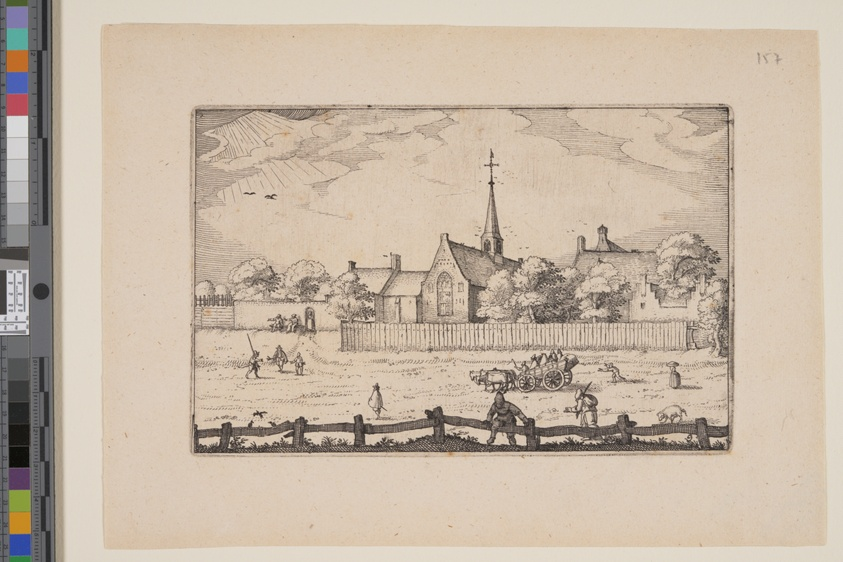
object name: Print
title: The Leper-House at Haarlem, from Views in the Surroundings of Haarlem (Plaisante Plaetsen)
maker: Claes Jansz. Visscher (Netherlandish, c. 1550–c. 1612)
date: 1610/20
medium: Etching on ivory laid paper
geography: Netherlands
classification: print; paper; prints and drawing; etching